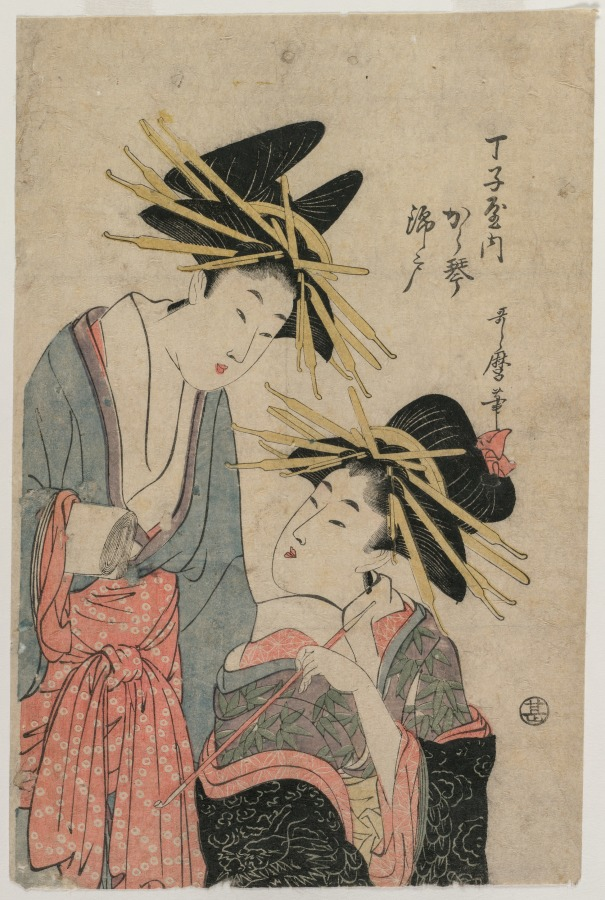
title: The Courtesans Karagoto and Nishikido of Chojiya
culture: Japan, Edo period (1615–1868)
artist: Kitagawa Utamaro II (Japanese, d. 1831?)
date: late 1800s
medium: color woodblock print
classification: Print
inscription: Signature: Utamaro hitsu Publisher: Maruya Jimpachi (emblem)